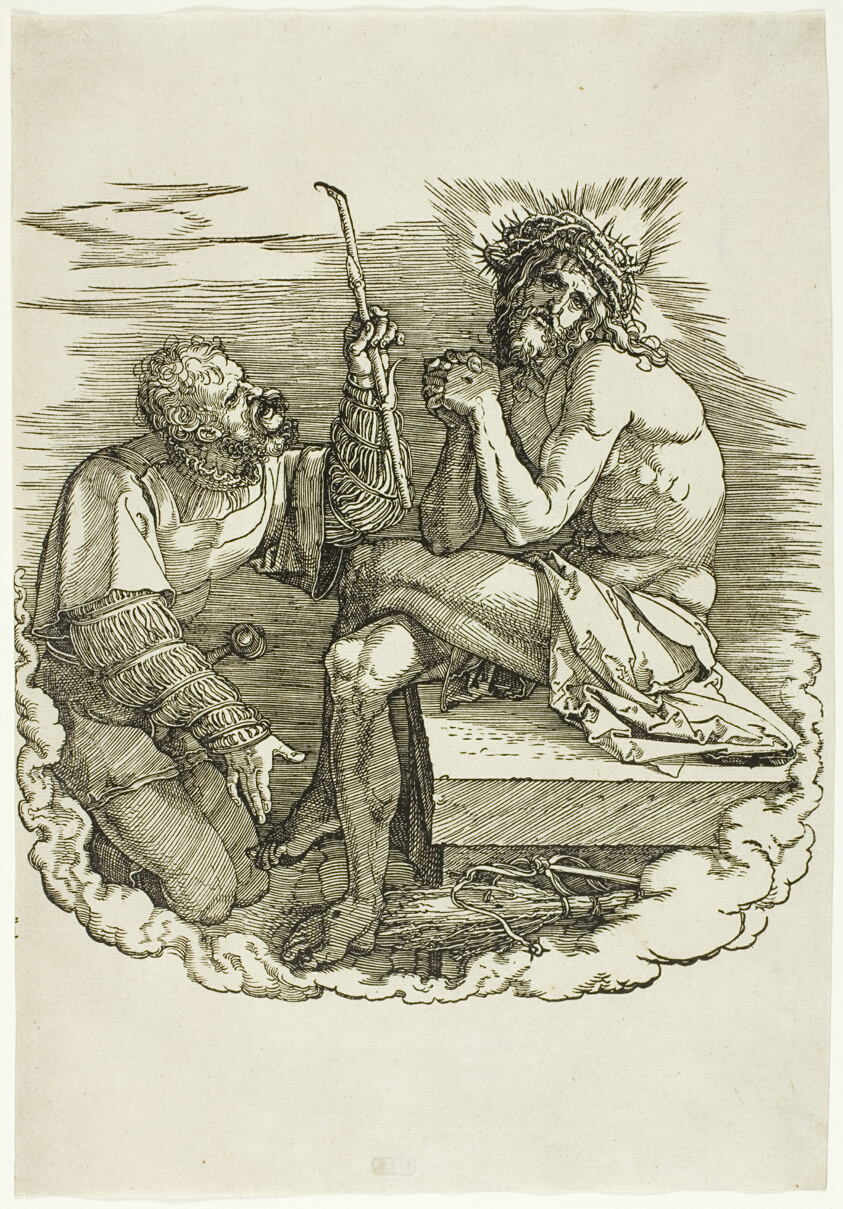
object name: Print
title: Christ, Man of Sorrows, Mocked by a Soldier, frontispiece from The Large Passion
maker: Albrecht Dürer (German, 1471-1528)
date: 1511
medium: Woodcut in black on ivory laid paper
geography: Germany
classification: woodcut; print; prints and drawing; paper